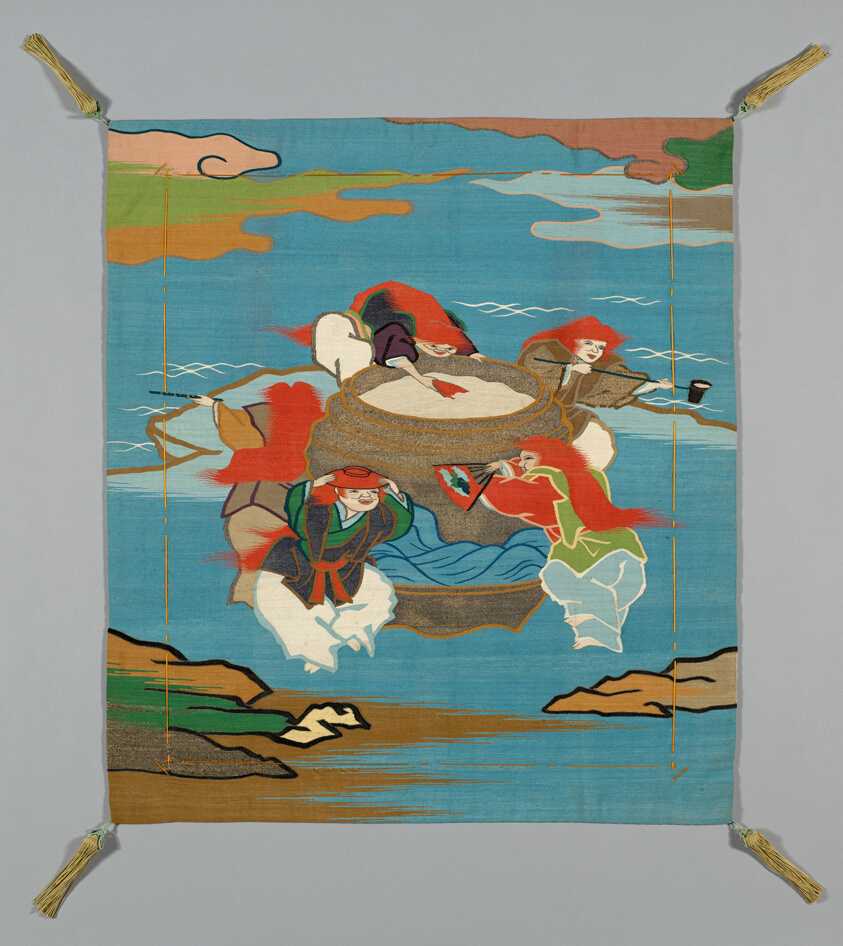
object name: Textile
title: Fukusa (Gift Cover)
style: late edo, meiji, edo (japanese period), Japanism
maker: Japan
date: late Edo period (1789–1868)/ Meiji period (1868–1912), 19th century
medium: Mon side: silk, plain weave with “crepe-like” effect (kabe-ito wefts) (kabe-ori); dye extracted through stenciled chemical dye stripper (bassen); impressed; patterned side: silk and silver-and-gold-leaf-over-lacquered-paper strip wrapped cotton, slit tapestry weave; silk, running “controlling” stitches; corners: silk, tubular 1:1 oblique interlacing over cotton core, knotted; silk-wrapped wood form and re-plied silk, fringe tassels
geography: Japan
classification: textile; weaving - printed; weaving